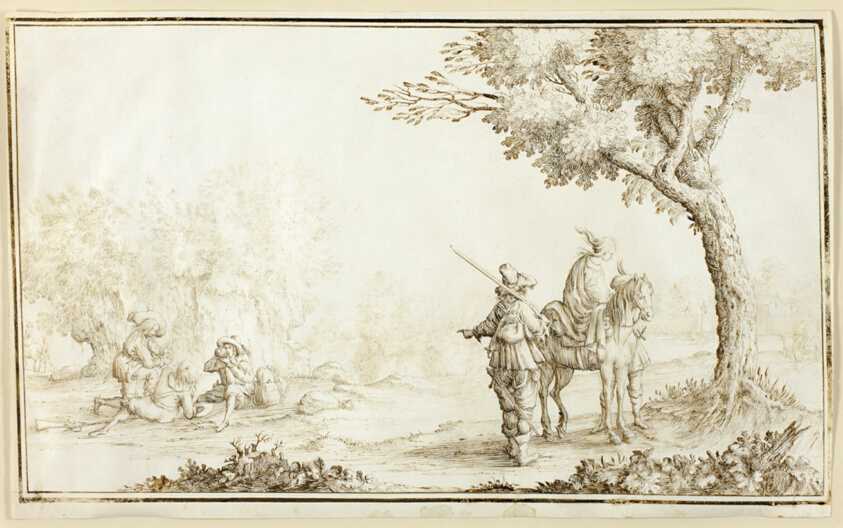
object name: Drawing and Watercolor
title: Landscape with Travelers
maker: Valerio Spada (Italian, 1613-1688); after Jacques Callot (French, 1592-1635)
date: early 1630s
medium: Pen and brown ink on vellum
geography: Italy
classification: pen and ink drawings; drawings (visual works); prints and drawing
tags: Romani, people, prints and drawings